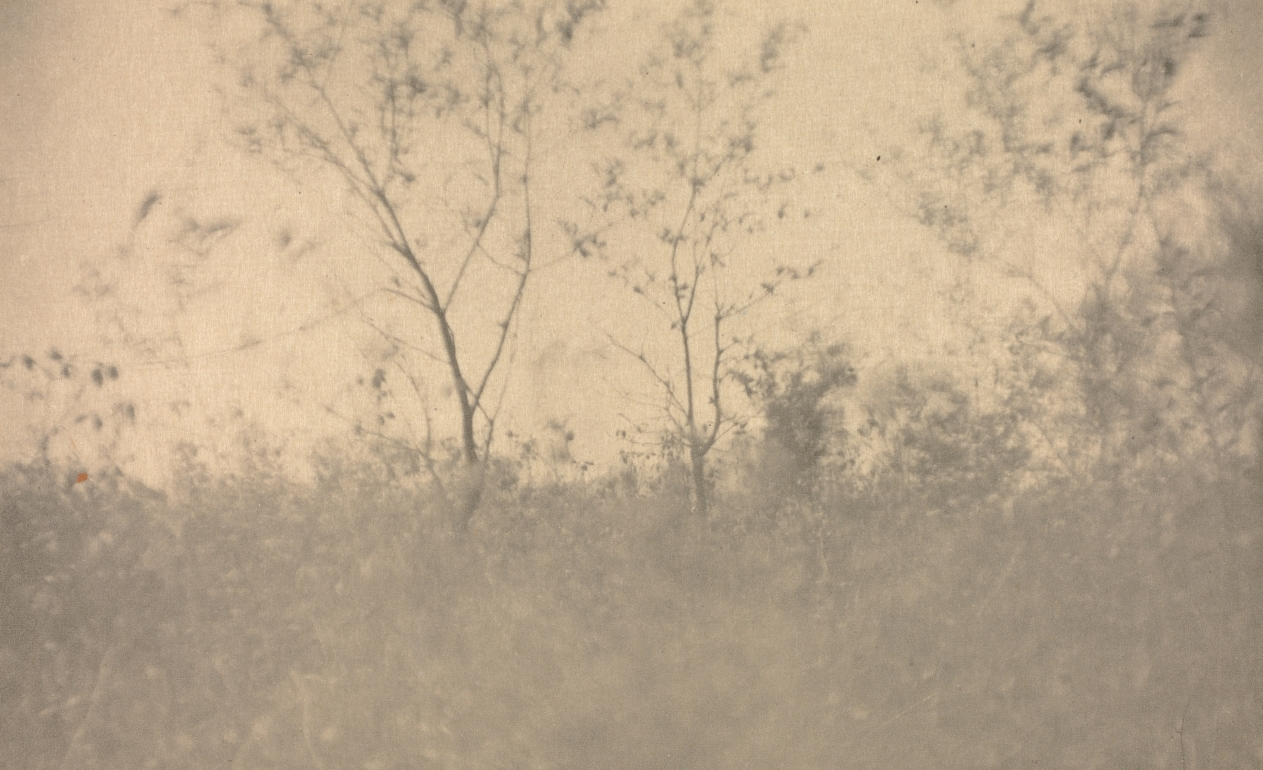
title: Camera Work: Spring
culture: America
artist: Joseph T. Keiley (American, 1969–1914)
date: 1907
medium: photogravure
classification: Bound Volume